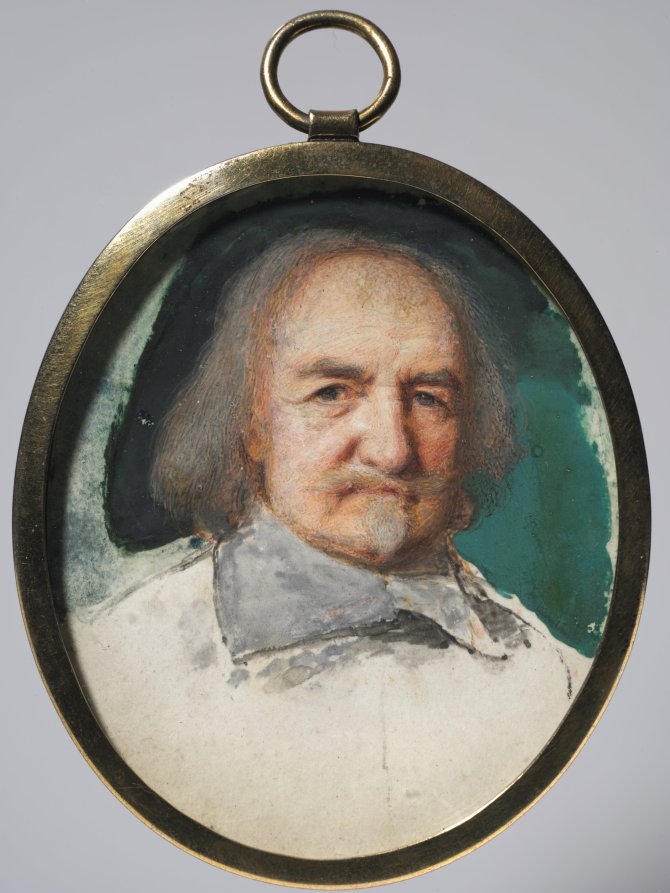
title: Portrait of Thomas Hobbes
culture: England, 17th century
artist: Samuel Cooper (British, 1608/09–1672)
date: c. 1660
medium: watercolor on vellum in a gilt metal frame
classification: Portrait Miniature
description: In his seventies when the portrait was painted, Thomas Hobbes (1588–1679) is turned slightly to his left, his eyes directed at the spectator. He has thin gray hair extending to his collar and a gray mustache and goatee. Only his head is finished; a thin gray wash loosely describes a plain, flat collar. Hobbes was born in Malmesbury, Wiltshire. In spite of humble parentage, he rose to prominence as a brilliant linguist and author of the 1651 book Leviathan, a seminal work of social contract theory that advocated for government led by a strong sovereign. As a royalist he was forced to flee England when the civil war broke out in 1642, and he resided in France until the war’s end in 1651. He was a friend of Cooper, who painted his miniature on at least two occasions.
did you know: A replica of Cleveland’s miniature was painted by Lady Margaret Bingham, Countess of Lucan.